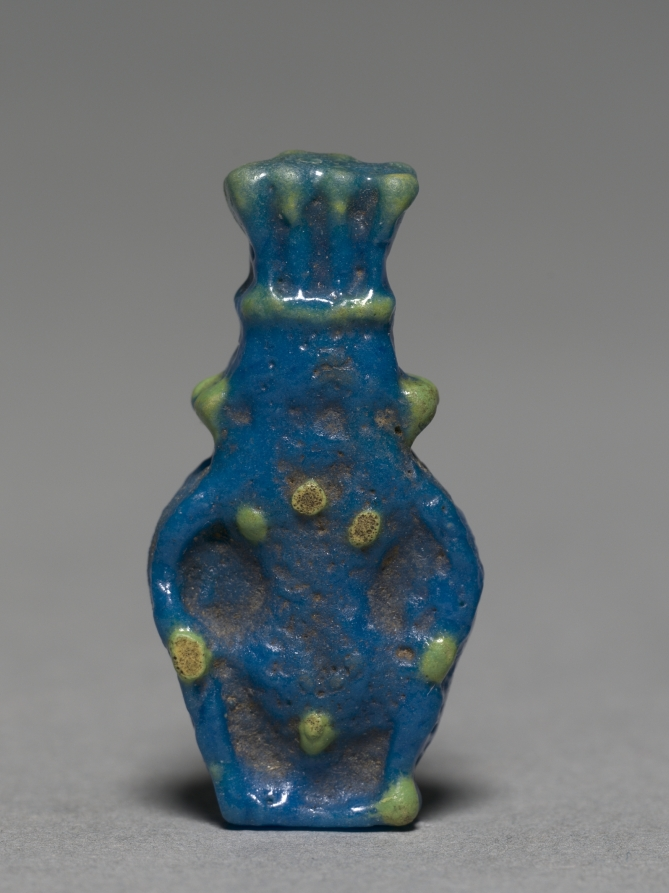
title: Amulet of Bes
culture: Egypt, Greco-Roman period (332 BCE–395 CE), Roman empire (30 BCE–395 CE)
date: 30 BCE–395 CE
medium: polychrome faience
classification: Amulets